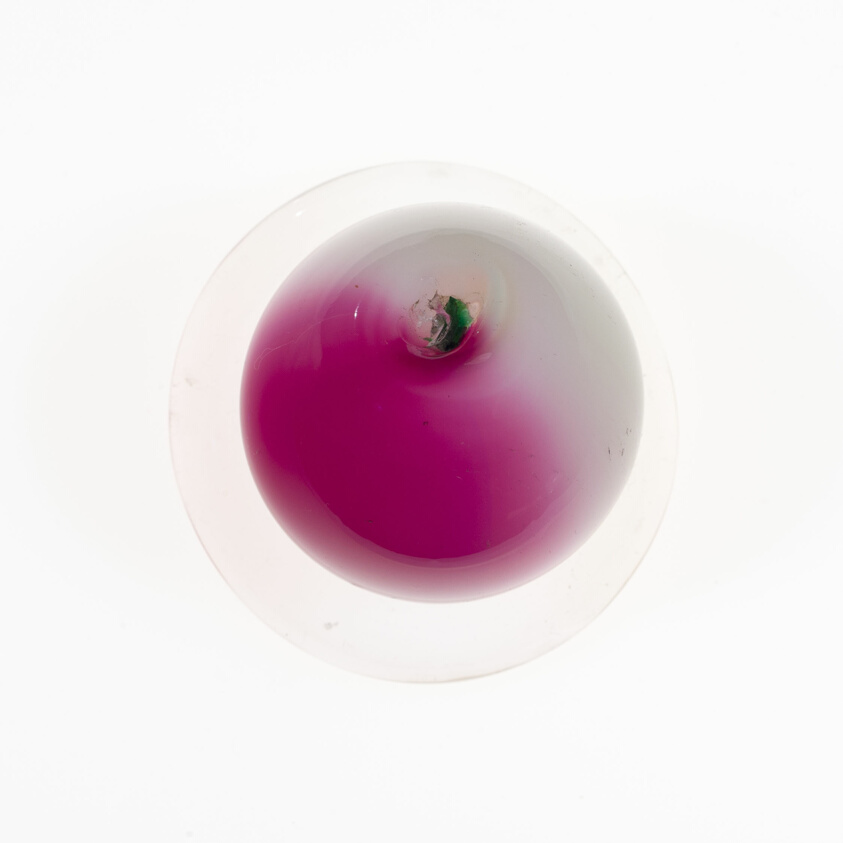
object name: Glass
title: Paperweight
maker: New England Glass Company (Cambridge, Massachusetts, 1818-1888)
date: Late 19th century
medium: Glass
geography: United States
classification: paperweight; glass